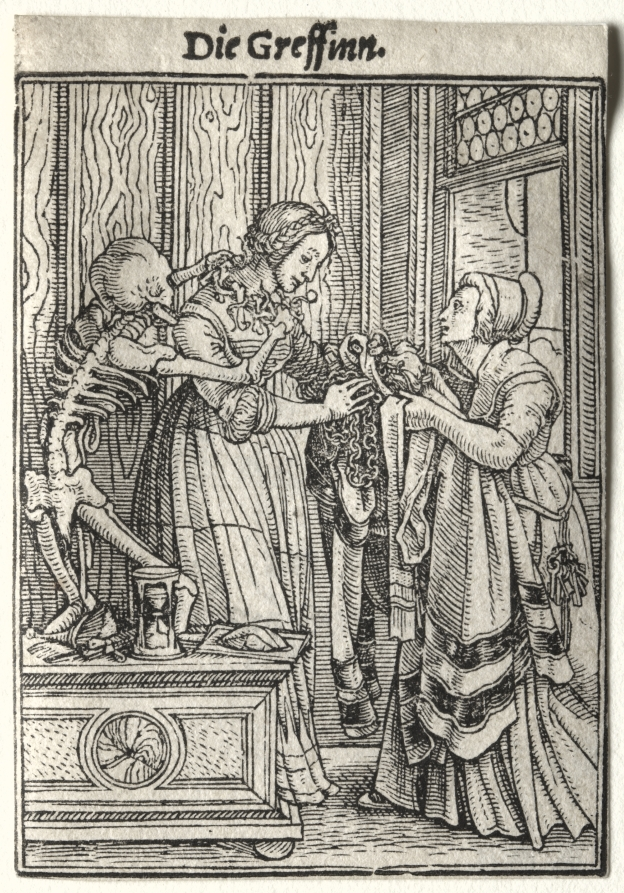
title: Dance of Death: The Countess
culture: Germany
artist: Hans Holbein the Younger (German, active England and Switzerland, 1497/98–1543)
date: c. 1526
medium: woodcut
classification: Print